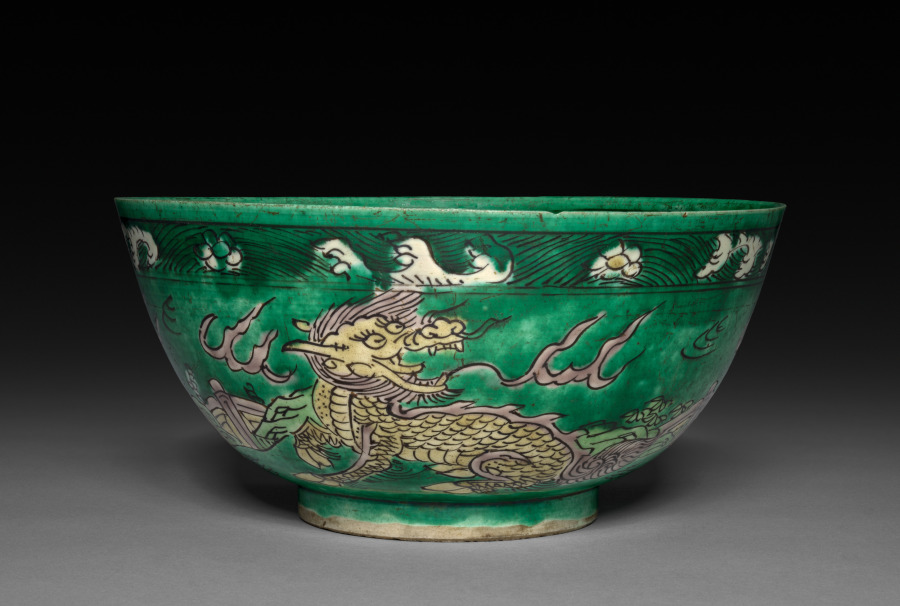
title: Bowl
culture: China, Ming dynasty (1368-1644), Xuande reign (1425-1435)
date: 1426–1435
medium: porcelain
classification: Ceramic